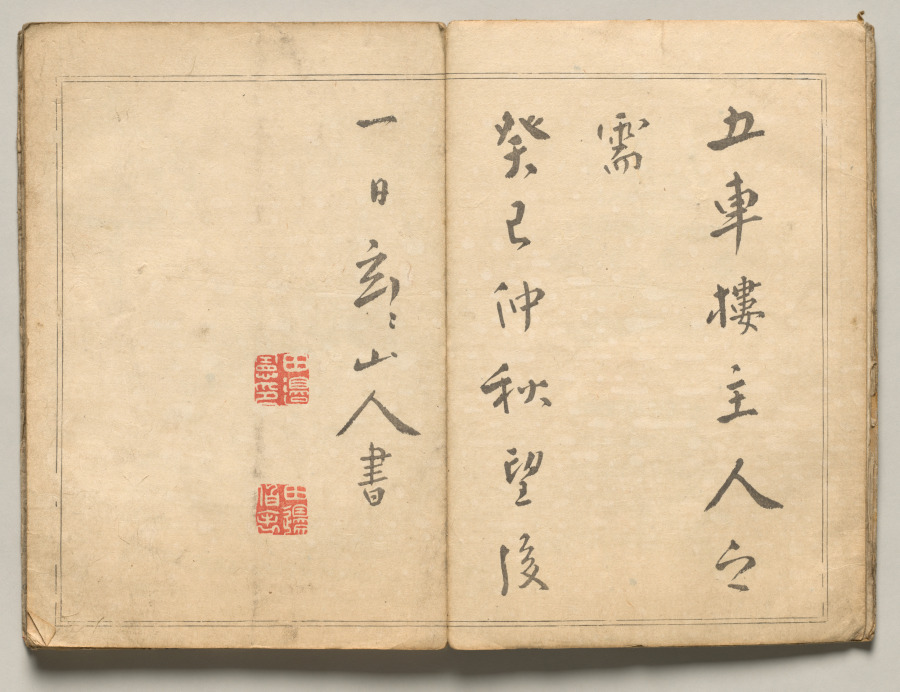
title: Preface from Ōkyo Picture Book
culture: Japan, Edo period (1615–1868)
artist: after Maruyama Ōkyo (Japanese, 1733–1795)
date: 1850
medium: accordion-style woodblock printed folding-book; ink and color on paper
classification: Bound Volume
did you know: This impression of a book of woodblock-printed designs is missing a spread that depicts a crane.